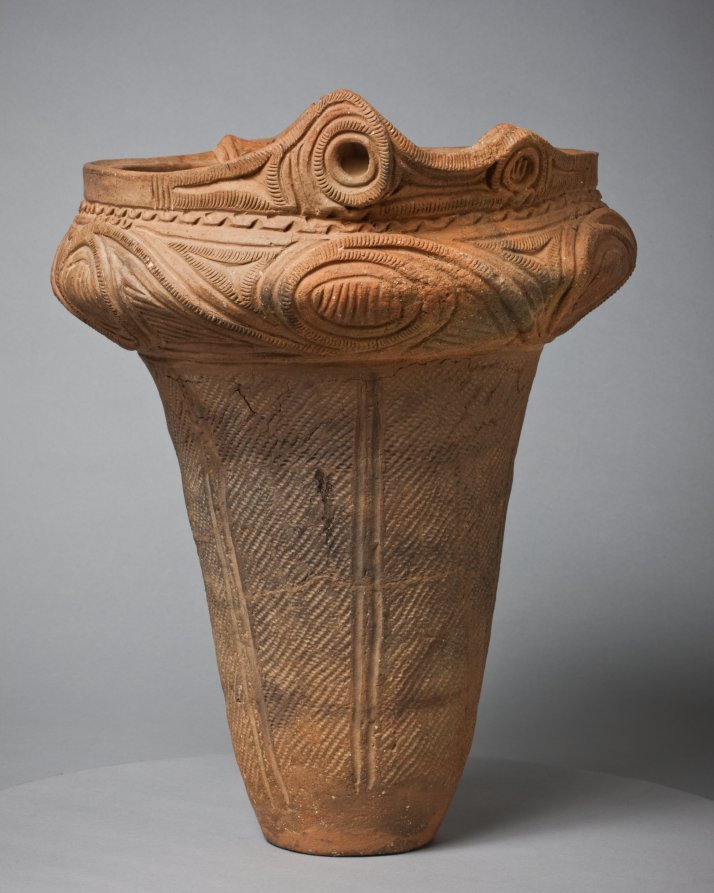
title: Urn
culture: Japan, Jōmon period (c. 10,500–300 BCE)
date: c. 2000 BCE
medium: earthenware, terracotta, impressed and incised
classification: Ceramic